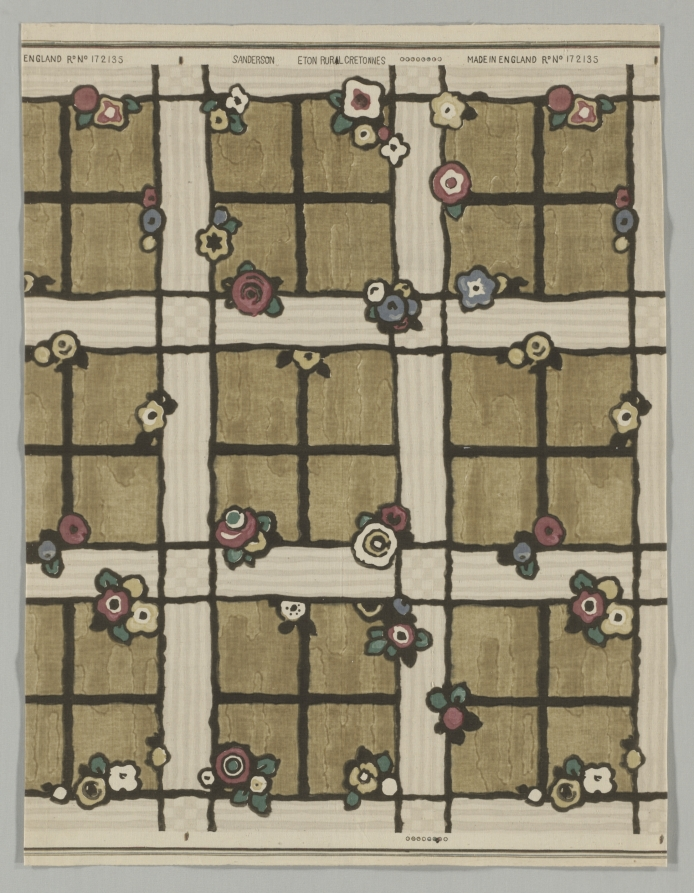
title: Eton Rural Cretonne (No. 172135)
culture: England, late 19th century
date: late 19th century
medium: plain weave cotton, printed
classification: Textile